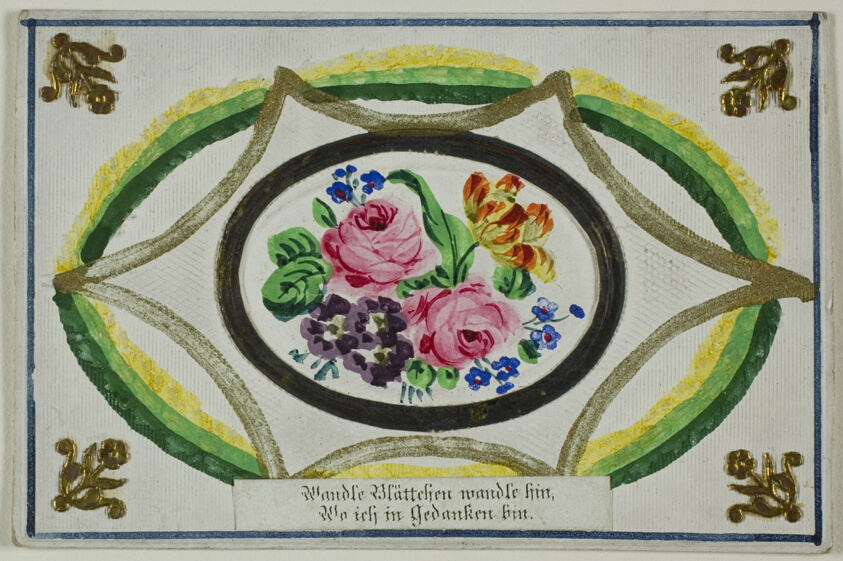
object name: Drawing and Watercolor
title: Wandle Blättchen mandle hin, Wo ich in Gedanken bin (valentine)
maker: Unknown Artist; German, 19th century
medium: Watercolor and collaged elements, with gold paint on embossed ivory card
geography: Germany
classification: valentine; prints and drawing